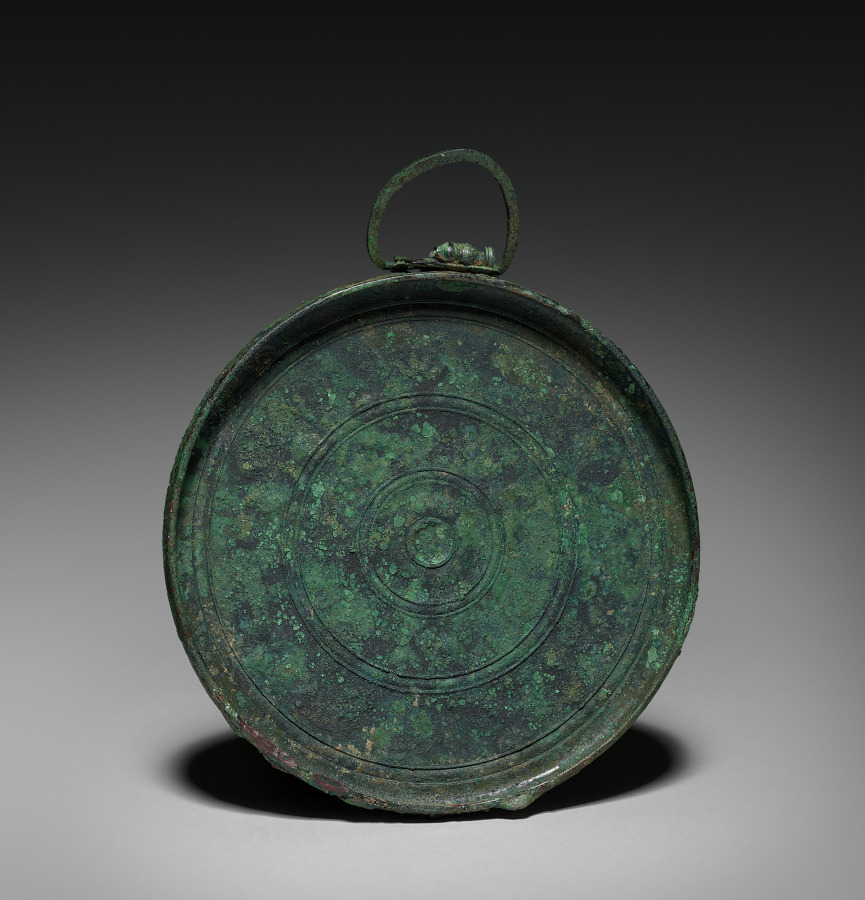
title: Mirror Case with Cover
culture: Greece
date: 300s BCE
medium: bronze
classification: Metalwork